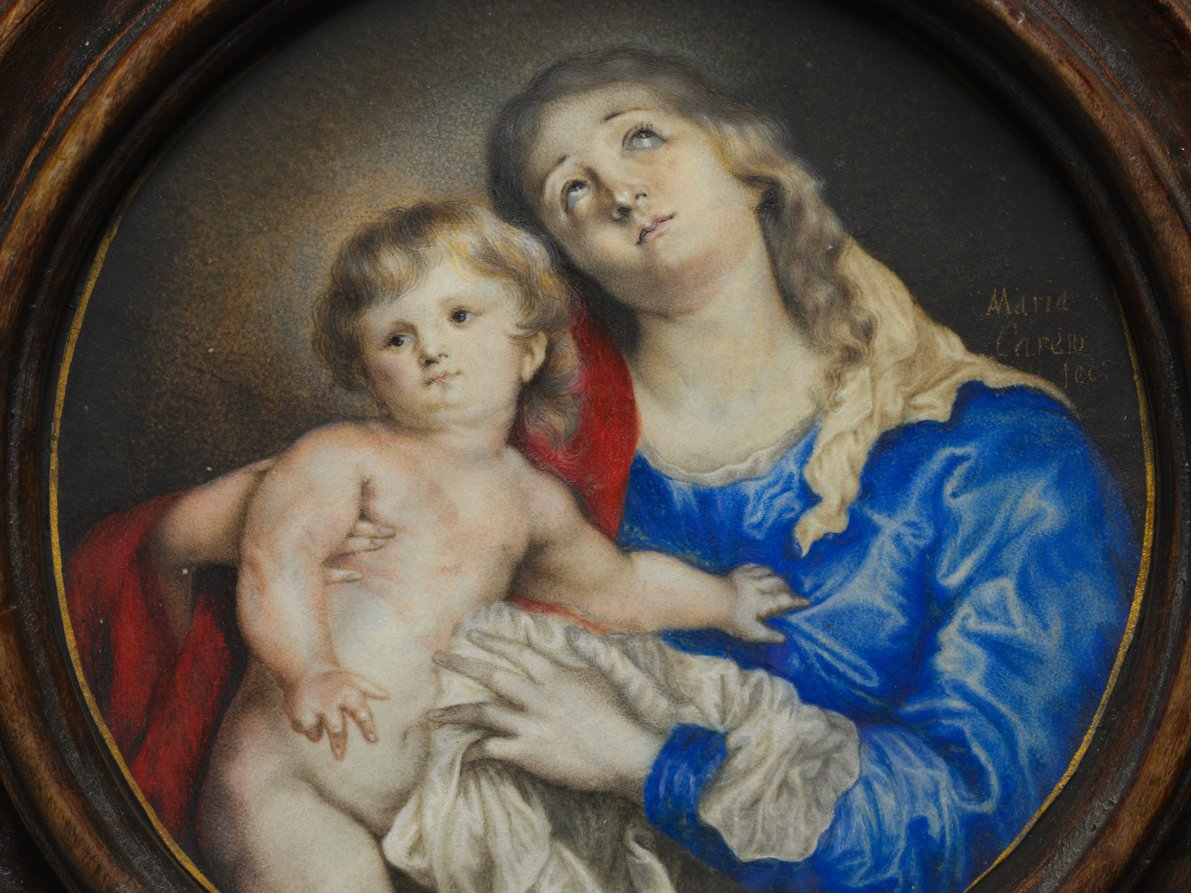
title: Virgin and Child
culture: England, 17th century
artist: Anna Maria Carew (British)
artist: after Anthony van Dyck (Flemish, 1599–1641)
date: c. 1662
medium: watercolor heightened with gum on vellum, with gold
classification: Portrait Miniature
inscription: signed at right center: "Maria Carew / fect"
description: Larger in size than most portrait miniatures, the Madonna and Child by Anna Maria Carew is a cabinet miniature, or a small work on vellum, enamel, or ivory that copies a full-scale oil painting. In this case the original painting was by Flemish artist Anthony van Dyck, and engraved by Paulus Pontius around 1630 shortly after it was painted. As a cabinet miniature, this work is somewhat unusual because of its religious subject and its simplicity. Cabinet miniatures tended instead to reproduce paintings of dramatic subjects and climactic moments in myths or religious stories. They could be hung on the wall or stored in elaborate and specially designed furniture, and they were often displayed in the smaller, more private rooms of a house.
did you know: King Charles II awarded Carew an annual pension to copy in miniature from the royal collection.